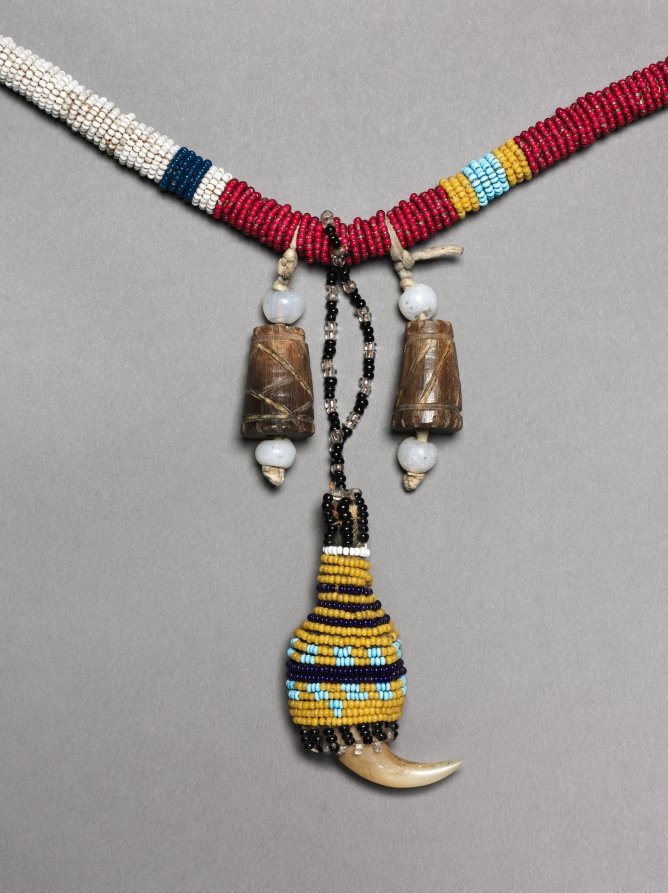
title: Beaded Necklace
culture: Africa, Southern Africa, South Africa, possibly Zulu-style maker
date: c. 1900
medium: Glass beads, probably plant fiber, sinew, horn beads, and claw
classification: Jewelry